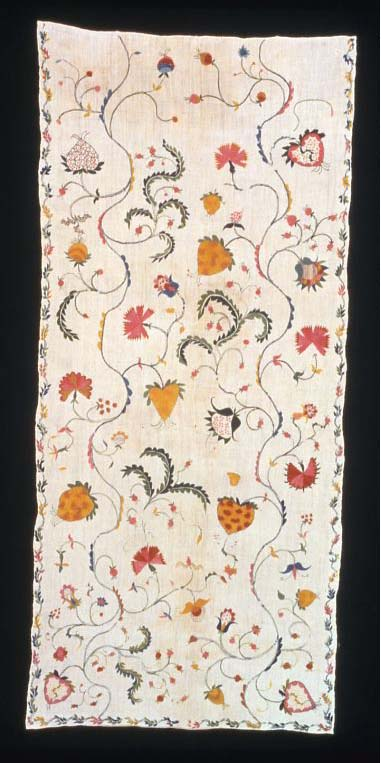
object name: Textile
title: Bed Curtain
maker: Hannah Hinman Twitchell Pierce (American, 1721/22–1770); United States, Connecticut, Southbury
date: c. 1760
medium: Linen, plain weave; curtains: embroidered with wool in cross, Romanian, running, satin, and stem stitches; valances: embroidered in Romanian, satin, and stem stitches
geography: Connecticut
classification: textile; needlework (visual works)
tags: flowers, foliage